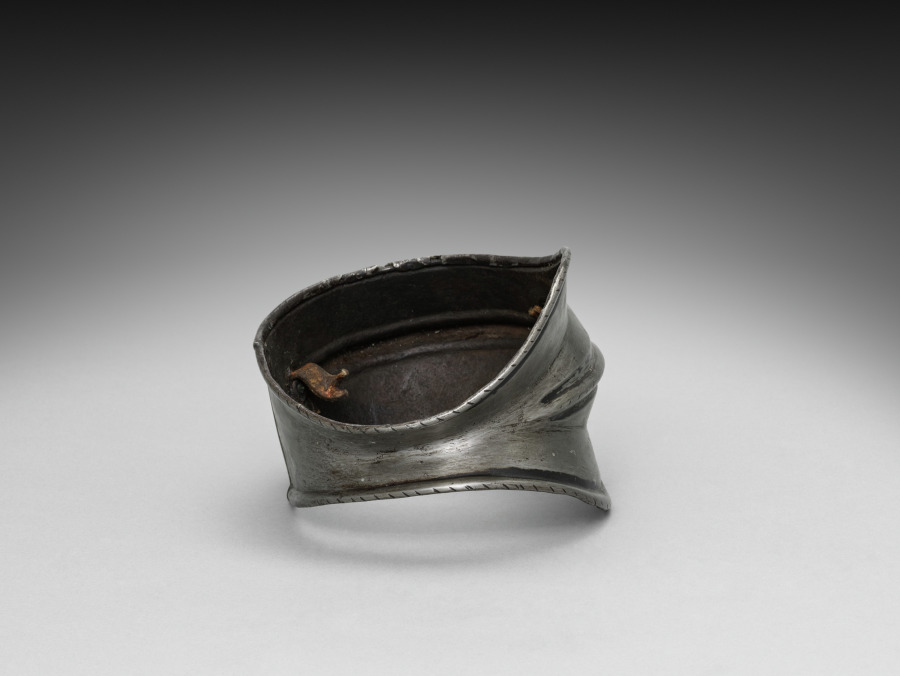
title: Knee Cap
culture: Germany, 19th century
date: 1801–1900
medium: steel with black paint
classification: Arms and Armor